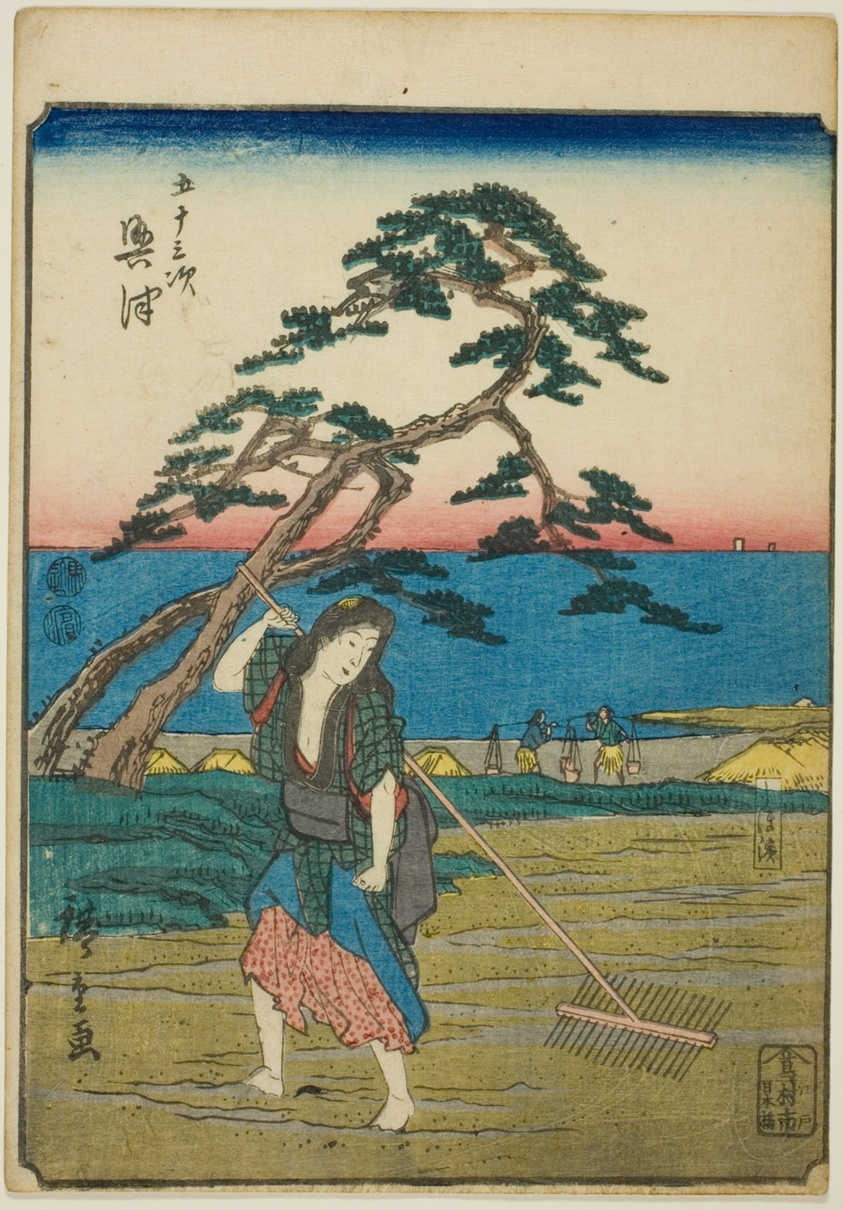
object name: Print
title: Okitsu, from the series "Fifty-three Stations [of the Tokaido] (Gojusan tsugi)," also known as the Figure Tokaido (Jinbutsu Tokaido)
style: Japanese (culture or style)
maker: Utagawa Hiroshige 歌川 広重; Japanese, 1797-1858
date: 1852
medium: Color woodblock print; chuban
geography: Japan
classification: woodblock print; print